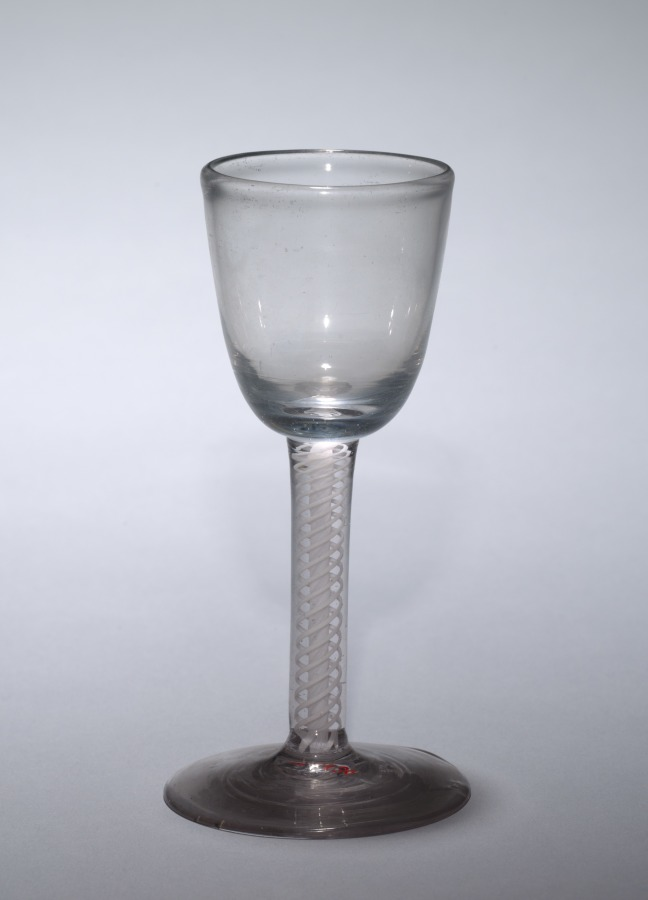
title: Wine Glass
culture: England, 18th century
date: 1750–1799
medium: glass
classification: Glass